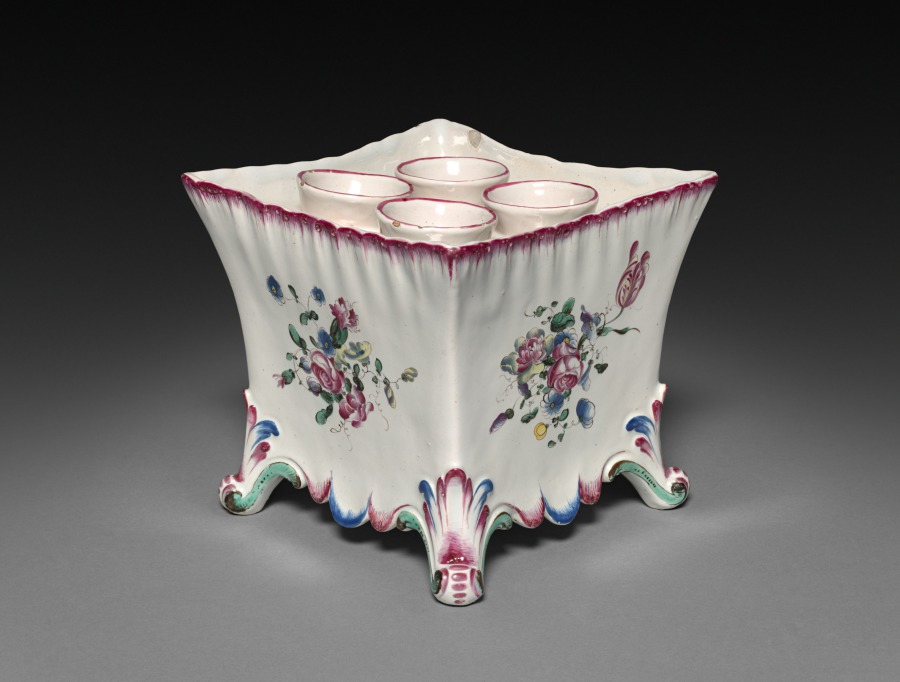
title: Flower Vase (Bouquetier)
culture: France, 18th century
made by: Aprey Pottery Factory (French)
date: c. 1775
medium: faience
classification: Ceramic